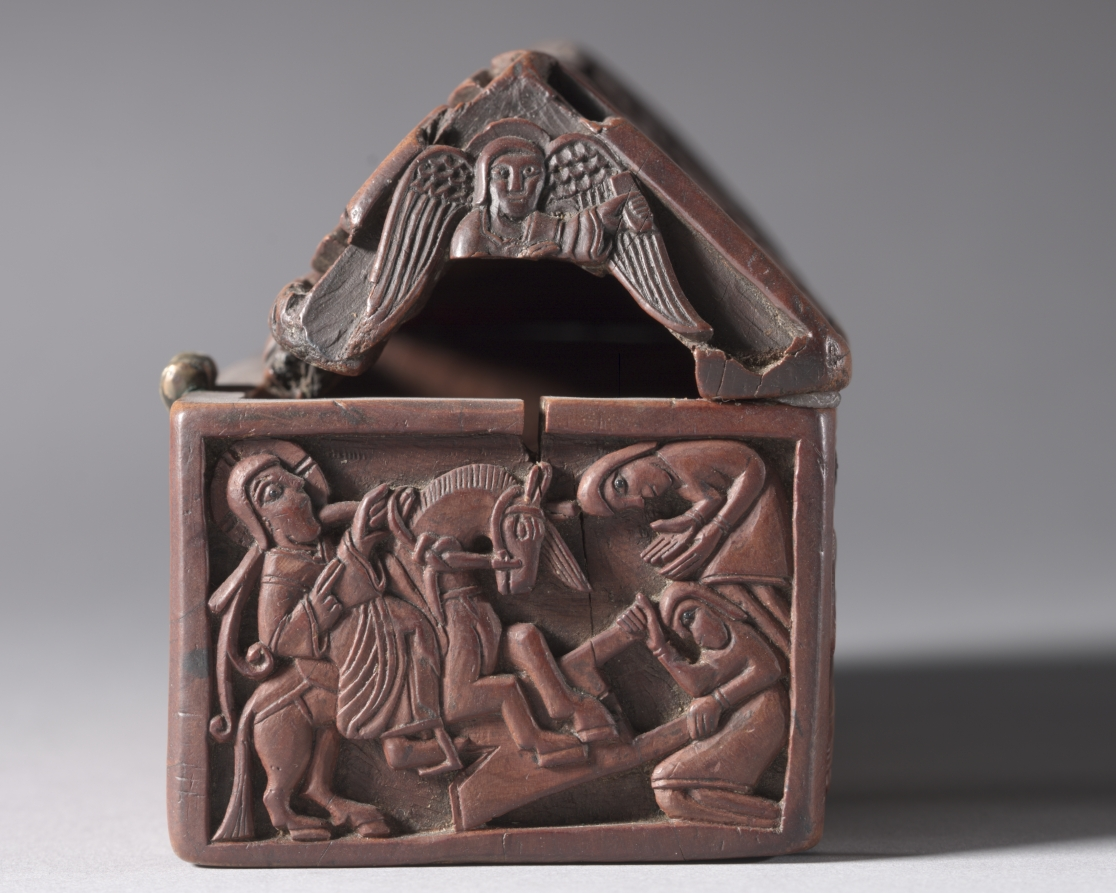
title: Wooden Casket: Scenes from the Life of Christ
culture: Anglo-Saxon, England, West Midlands?, Romanesque period, 11th century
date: c. 1050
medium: boxwood, copper-alloy, glass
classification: Furniture and woodwork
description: This casket is a rare, if not unique example of high-quality woodcarving from Anglo-Saxon England. Decorated with scenes from Christ’s life, it was likely made for an ecclesiastical purpose and may have housed relics. On one long side, the Christ child rests in the manger. Above, the Crucifixion is shown with mourners gathered below the cross and two angels flanking it on either side. On the other long side is the Ascension, God’s hand pulling Christ heavenward. Christ in Majesty appears above. The short sides show Christ’s baptism and his entry into Jerusalem.